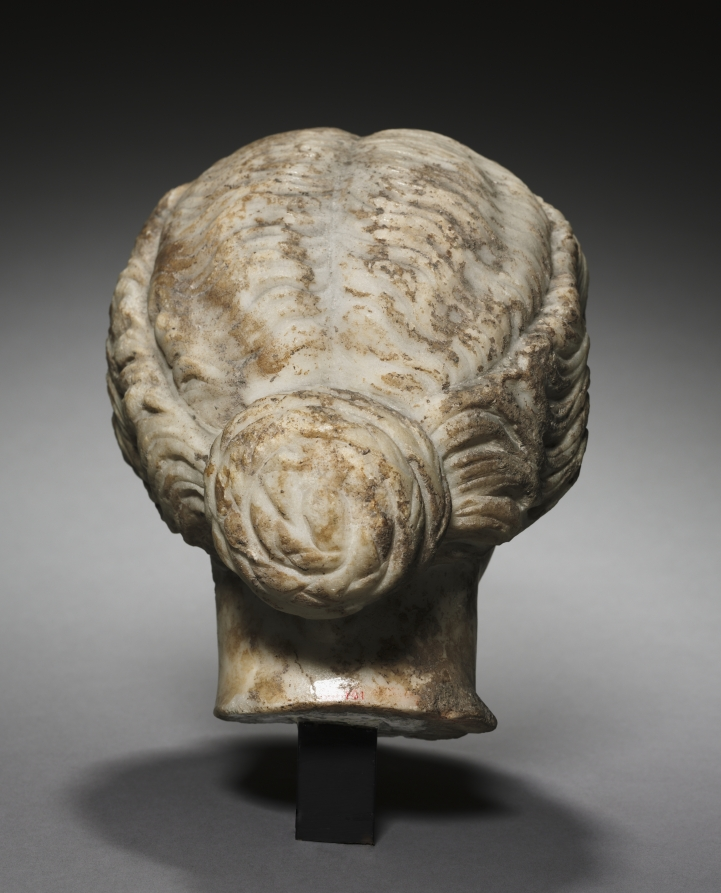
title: Portrait Head of a Woman, Probably the Empress Faustina Minor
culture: Italy, Roman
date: c. 165 CE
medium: marble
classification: Sculpture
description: Acquired in 1925, this head was initially identified as a portrait of the Empress Lucilla (lived AD 149-182), wife of the Emperor Lucius Verus, who co-ruled with Marcus Aurelius from AD 161-169. More recently, scholars have identified the portrait as a representation of the Empress Faustina Minor (lived c. AD 130-176/177), wife of Marcus Aurelius (r. 161-180) and mother of Lucilla. The two women, relatively close in age, share a number of portrait features: heavy-lidded eyes, with incised irises and pupils; small mouth; and a distinctive hairstyle, parted in the center and pulled back in waves to a braided knot at the base of the neck.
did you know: Scholars have disagreed about this portrait's identity—probably an empress, either Faustina Minor or Lucilla.